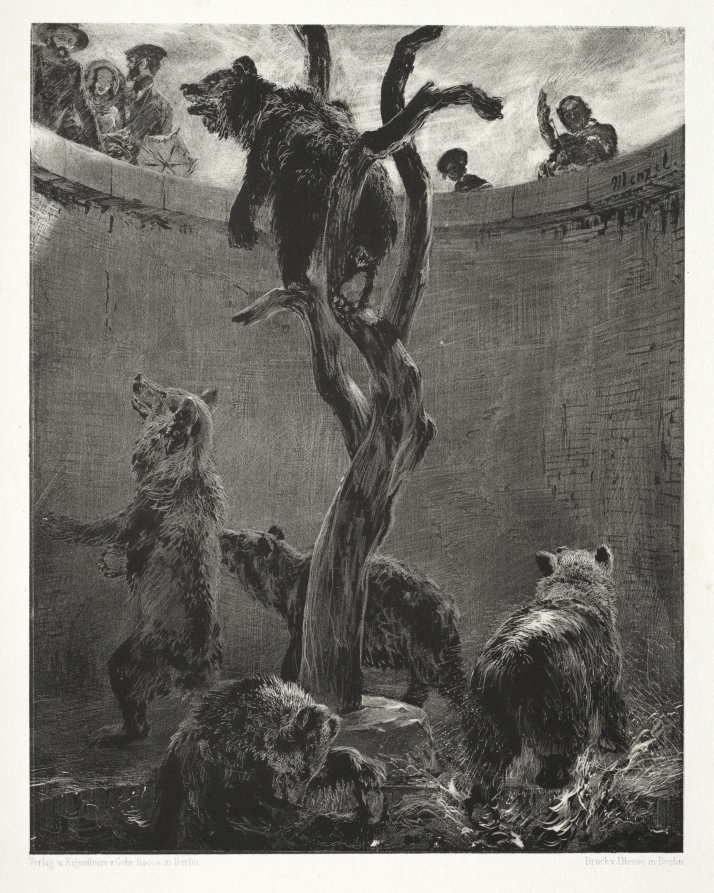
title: Essay on Stone with Brush and Scraper: The Bear Pit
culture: Germany, 19th century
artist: Adolph von Menzel (German, 1815–1905)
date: 1851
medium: lithograph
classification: Print